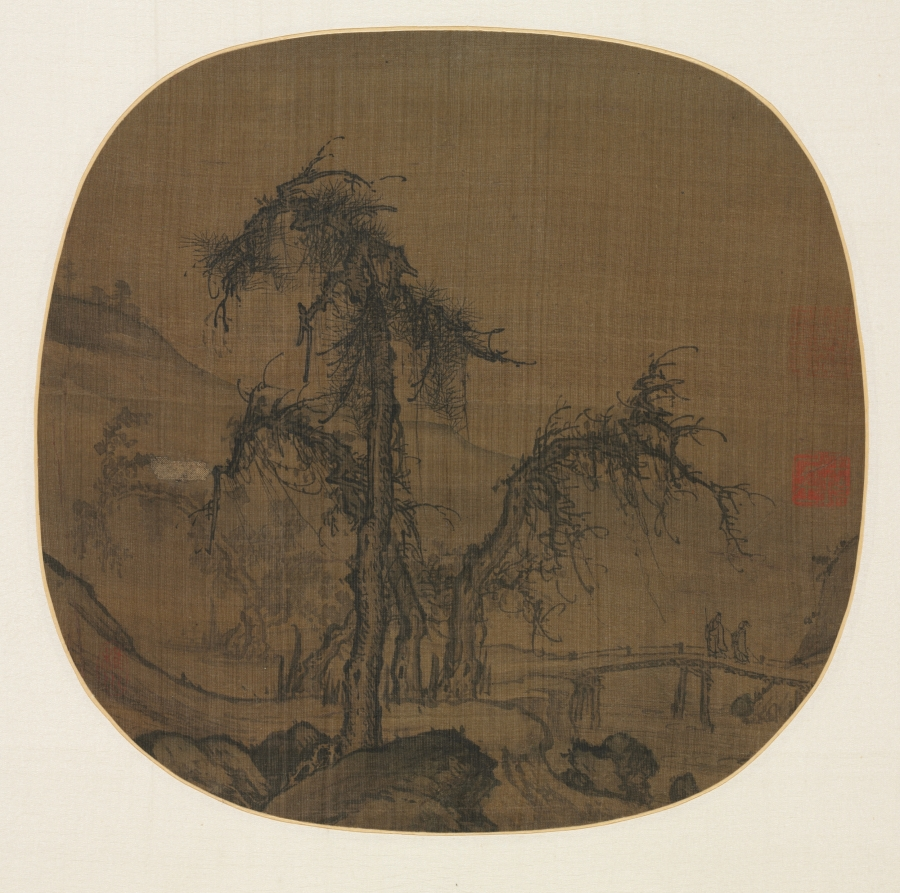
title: Ramblers over a Winding Stream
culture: China, Yuan dynasty (1271-1368)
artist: Luo Zhichuan (Chinese, active 1280s–1320s)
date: before 1330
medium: Album leaf; ink on silk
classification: Painting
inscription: Artist's seal: Zhichuan 稚川 (partially obliterated but readable). 2 additional seals: 1 of Duan Fang 端方 (1861–1911); 1 unidentified.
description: This album leaf is one of few surviving paintings by Luo Zichuan. During the Yuan dynasty, the Luo family of painters in Jiangxi province, in Southern China, had a network of patrons extending their reputation all the way to the capital city of Beijing. The small, rounded figures crossing the bridge on the right are gentlemen enjoying a ramble, rather than ascetics or travelers. The composition is dominated in the center foreground by “crab-claw” trees with knotty trunks and twisting branches. Their robust forms show Luo’s connection to the earlier master, Guo Xi (about 1020–about 1090).